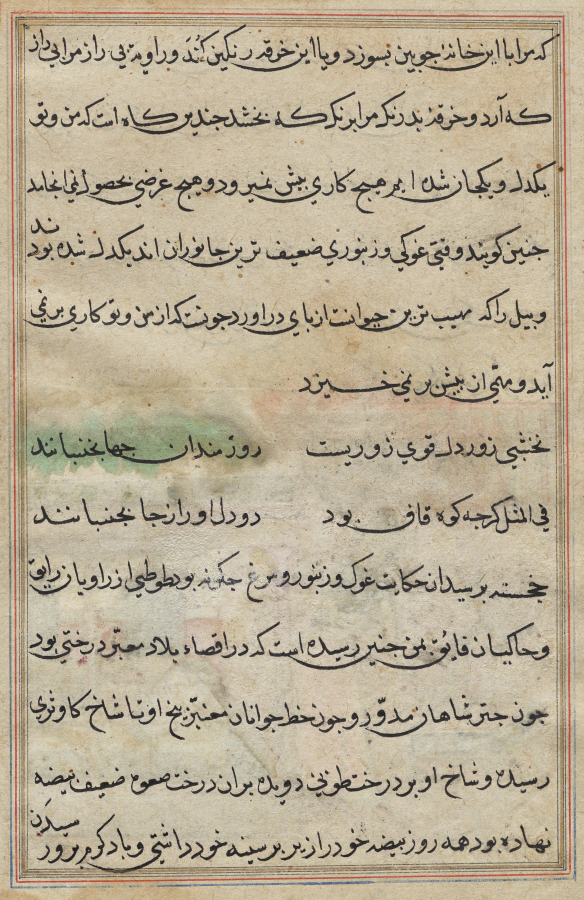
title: Page from Tales of a Parrot (Tuti-nama): text page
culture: Mughal India, court of Akbar (reigned 1556–1605)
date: c. 1560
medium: gum tempera, ink, and gold on paper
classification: Painting